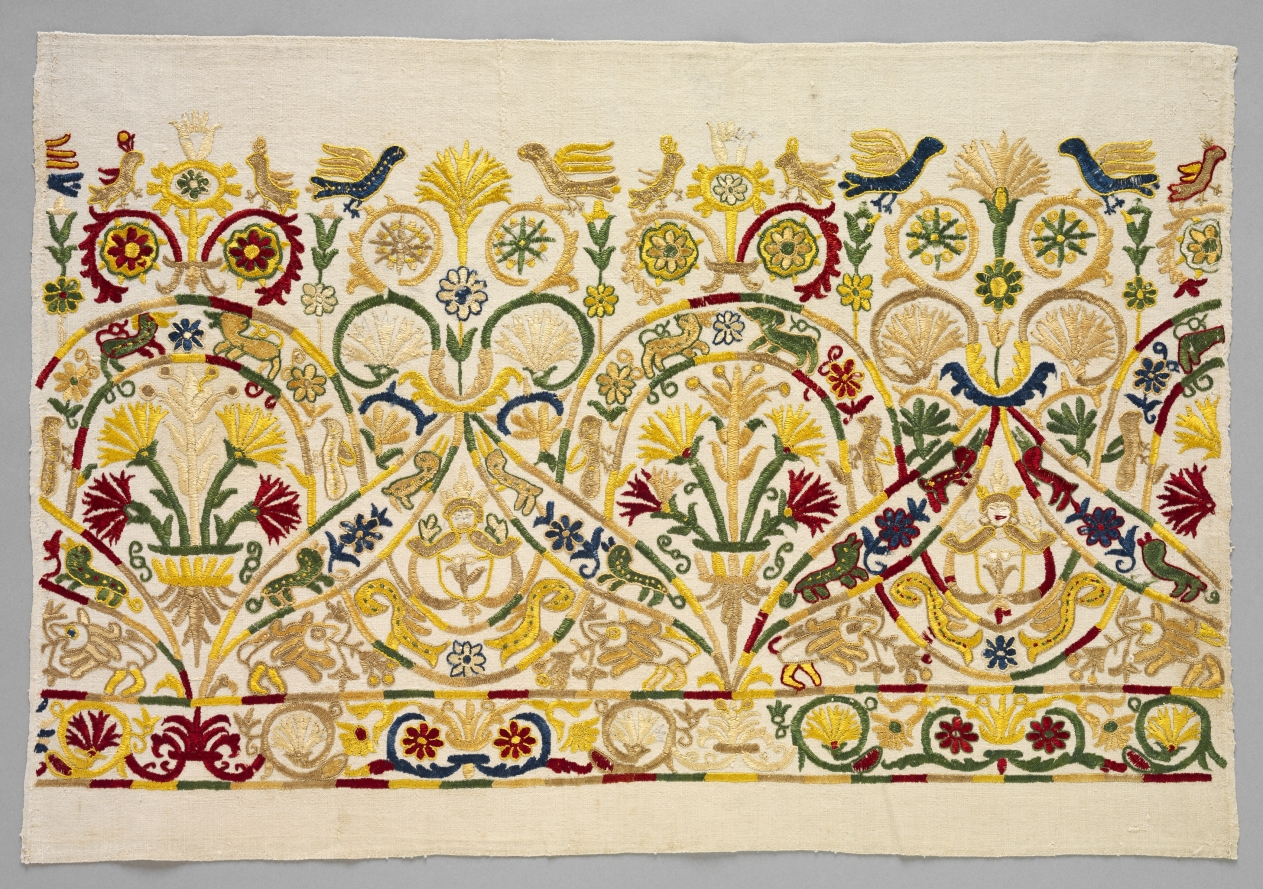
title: Fragment of a Skirt Border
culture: Greece, Crete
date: 1700s–1800s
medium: embroidery: silk on linen tabby ground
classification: Embroidery